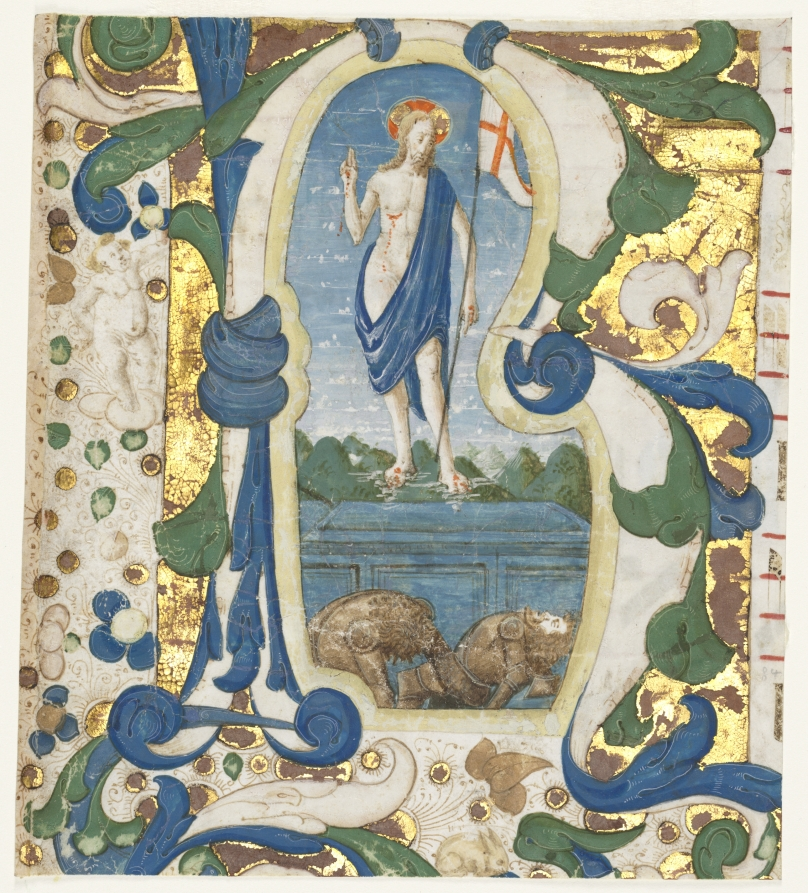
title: Historiated Initial (R) Excised from an Antiphonary: The Resurrection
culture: Italy, Florence, 15th century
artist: Francesco d'Antonio del Cherico (Italian, 1433–1484)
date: c. 1470–1475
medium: tempera and gold on parchment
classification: Manuscript